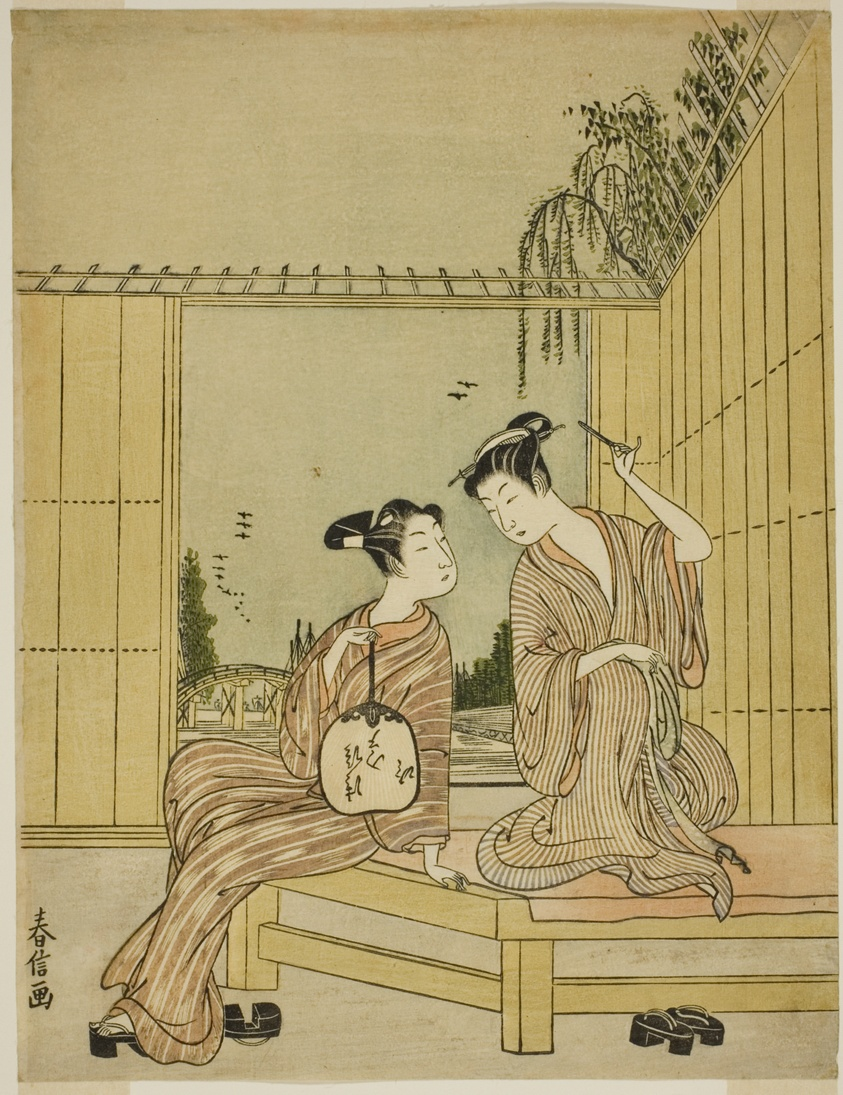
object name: Print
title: Young Couple Enjoying the Cool of Evening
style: Japanese (culture or style)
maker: Shiba Kokan (Suzuki Harushige); Japanese, 1747–1818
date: c. 1771/72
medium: Color woodblock print; chuban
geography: Japan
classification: woodblock print; print; asian art